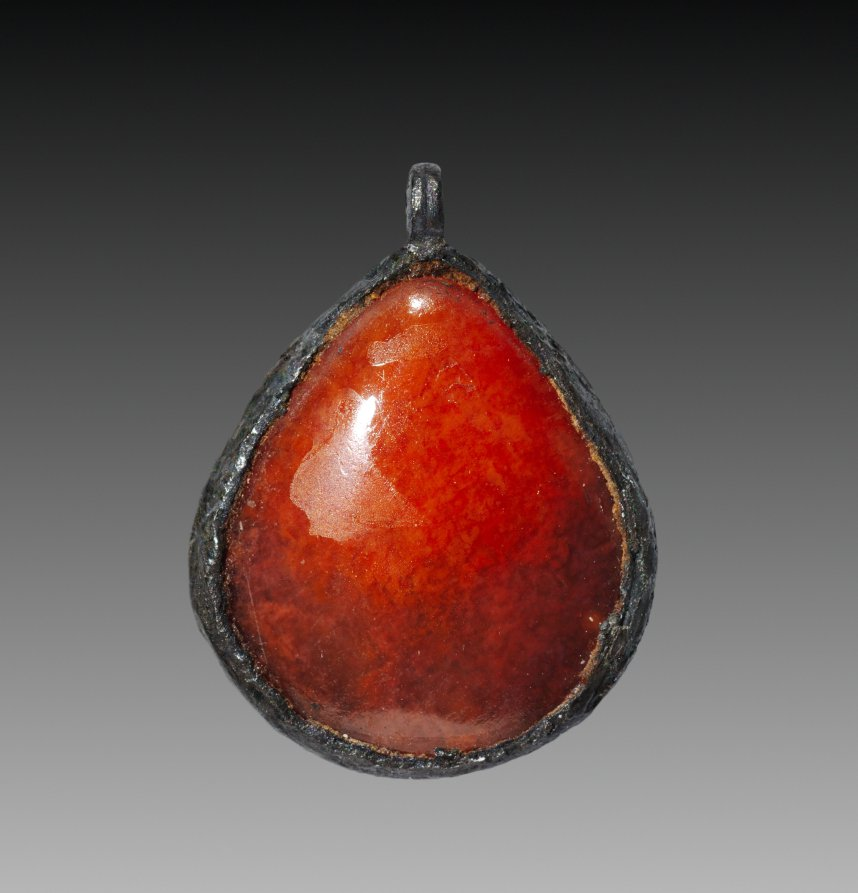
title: Oyster-Shell Pendant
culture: Egypt, Middle Kingdom (2040–1648 BCE), Dynasty 12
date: 1980–1801 BCE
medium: carnelian and silver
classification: Jewelry